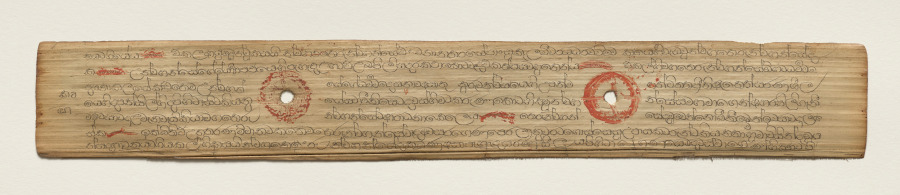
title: Leaf from a Buddhist Manuscript (recto)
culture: Sri Lanka, Singhalese, Late 17th century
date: c. 1700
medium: fiber paper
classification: Manuscript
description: Palm leaf material is still used for manuscripts in Sri Lanka. The palm leaves are prepared first by boiling them, drying them in the sun, and then rubbing them with oils. Scribes then use a metal stylus to incise the text. Then charcoal powder is wiped across the pages, filling in only the inscribed lines.